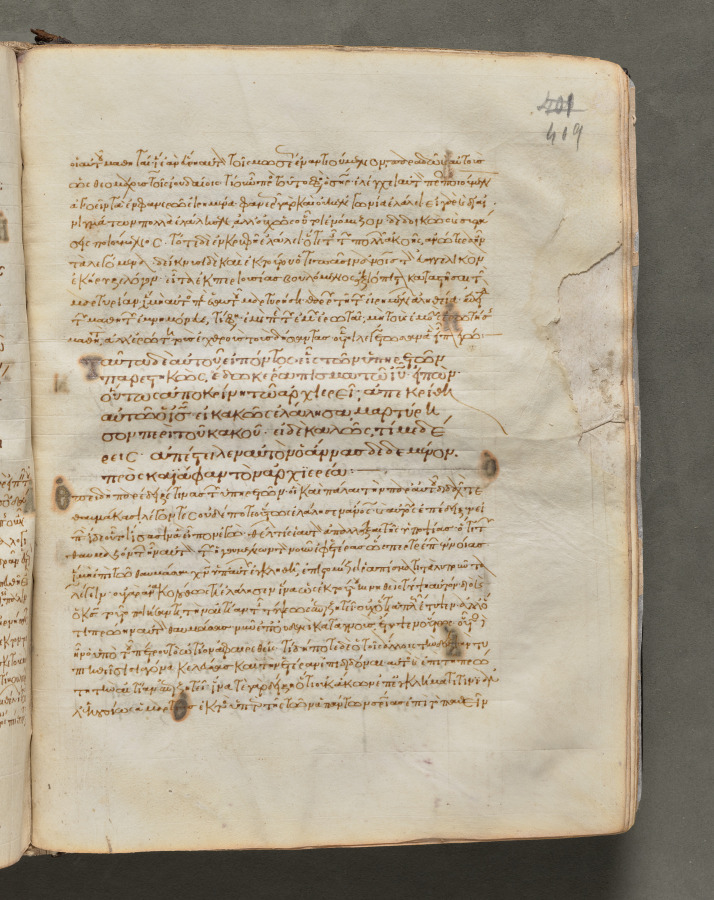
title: Text, folio 409 (recto), from a Gospel Book with Commentaries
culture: Byzantium, Constantinople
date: c. 1000–1100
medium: ink, tempera, and gold on vellum; leather binding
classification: Bound Volume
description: Each of the four gospels in this book opens on a page with brilliantly illuminated borders depicting the author of the text as well as birds—principally peacocks, symbols of the immortality of the soul—and fountains, representing the fountain of life and the salvation of the soul. This volume consists of 428 leaves with texts in Greek. Its level of sophistication suggests that it was probably written and decorated in a monastery in Constantinople.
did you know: Gospel books were carried in procession through Byzantine churches.